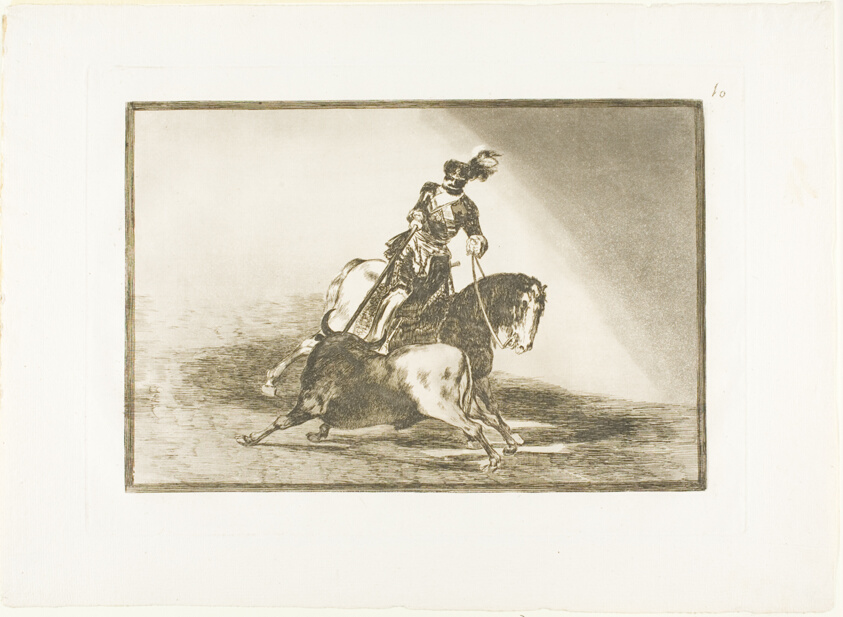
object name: Print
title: Charles V spearing a bull in the ring at Valladolid, plate ten from The Art of Bullfighting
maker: Francisco José de Goya y Lucientes (Spanish, 1746-1828)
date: 1814/16, published 1816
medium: Etching, burnished aquatint, drypoint and burin on ivory laid paper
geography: Spain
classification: etching; print; prints and drawing